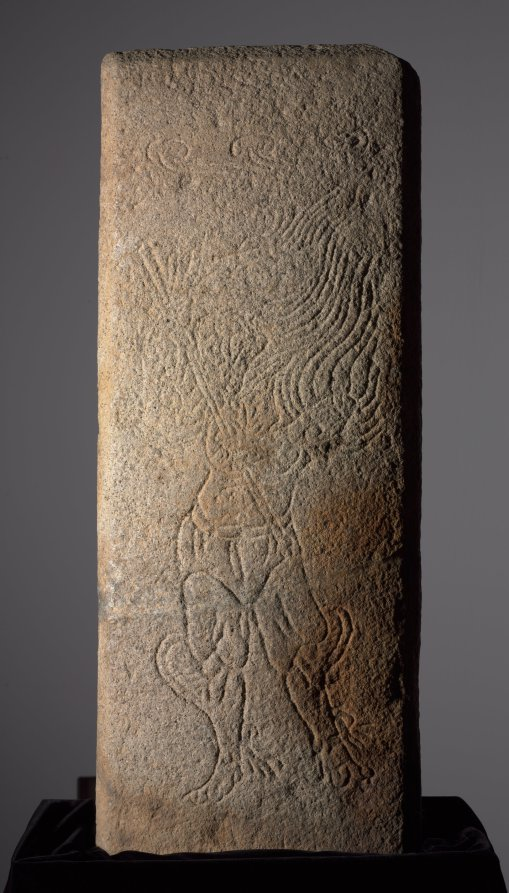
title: Stone Panel for Royal Tomb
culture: Korea, Unified Silla period (676-935)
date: late 700s-early 800s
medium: granite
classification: Sculpture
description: This panel shows a figure with a human body and the features of a rat, which is one of the signs of the Asian zodiac, and is likely one of 12 granite panels from a royal tomb. It is probably from Gyeongju—the capital of the kingdoms of the Silla (57 BCE–668) and Unified Silla (688–935) periods—where large royal tomb mounds can still be found. This panel resembles those showing the animal signs of the Korean zodiac from the tomb of General Kim Yusin (595–673) in Gyeongju, the most famous tomb of the period.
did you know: A rat, one of the signs of the East Asian zodiac, carved in this stone panel symbolizes wealth.